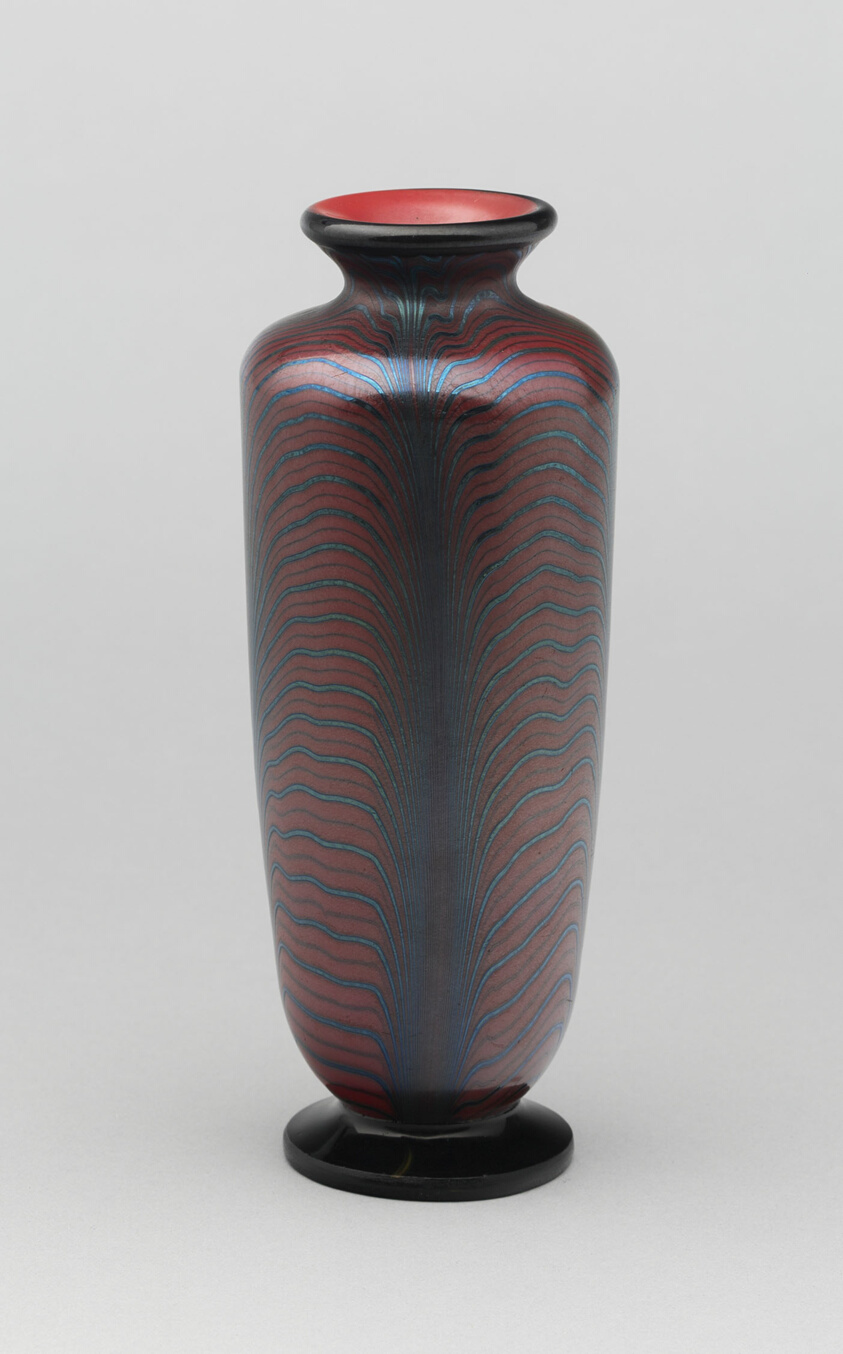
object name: Glass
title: Vase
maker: Tiffany Studios (American, 1902–32); Corona, New York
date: 1900–20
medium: Favrile glass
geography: United States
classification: vase; glass; american decorative arts; american arts; decorative arts